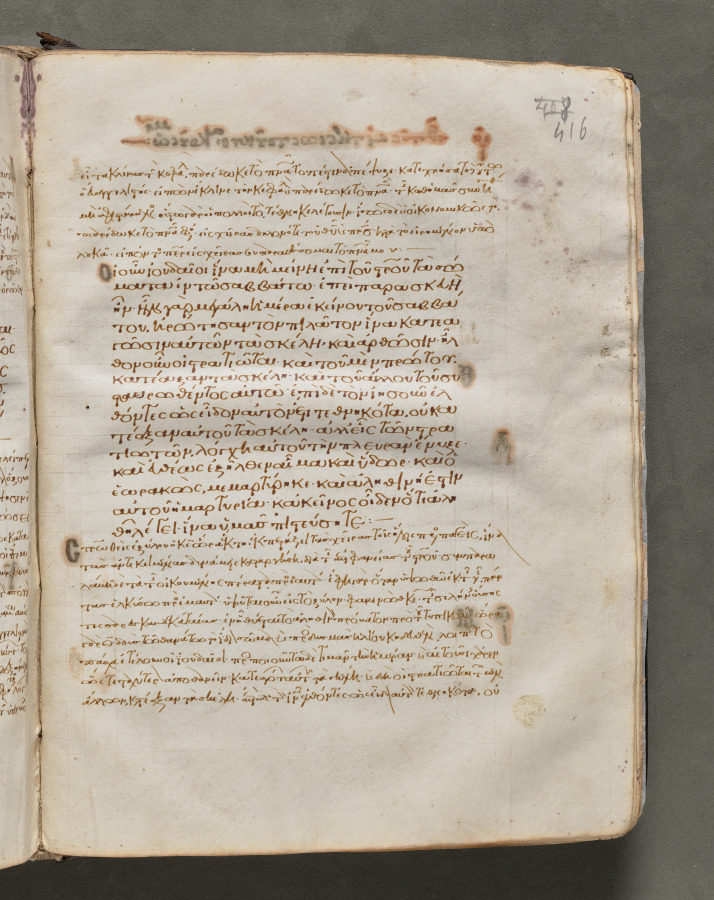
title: Text, folio 416 (recto), from a Gospel Book with Commentaries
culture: Byzantium, Constantinople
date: c. 1000–1100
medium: ink, tempera, and gold on vellum; leather binding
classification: Bound Volume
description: Each of the four gospels in this book opens on a page with brilliantly illuminated borders depicting the author of the text as well as birds—principally peacocks, symbols of the immortality of the soul—and fountains, representing the fountain of life and the salvation of the soul. This volume consists of 428 leaves with texts in Greek. Its level of sophistication suggests that it was probably written and decorated in a monastery in Constantinople.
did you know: Gospel books were carried in procession through Byzantine churches.